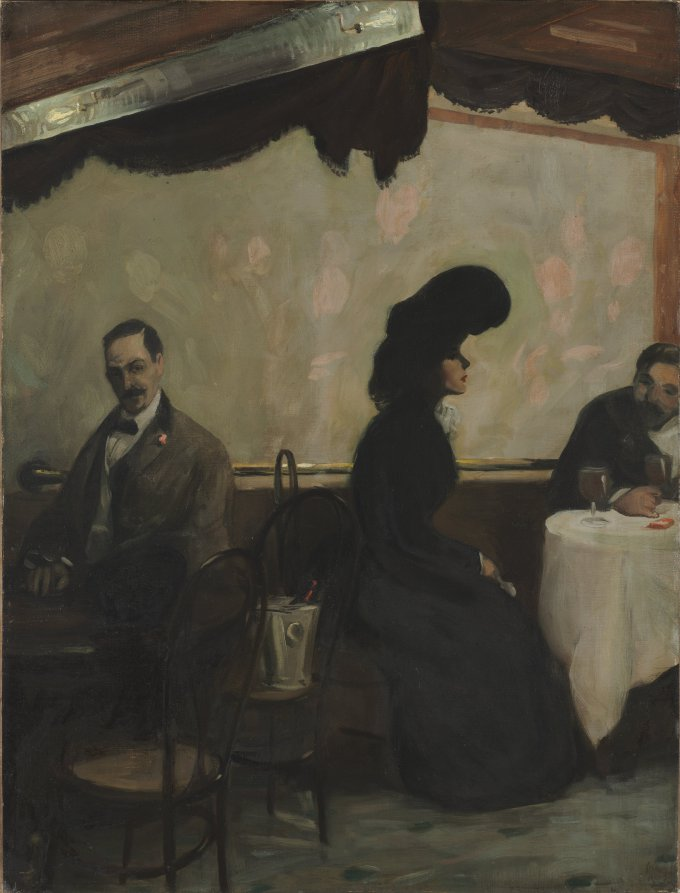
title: The Rathskeller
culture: America, early 20th Century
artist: John Sloan (American, 1871–1951)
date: 1901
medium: oil on canvas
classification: Painting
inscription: Signed lower right: "John / Sloan [JS in monogram]"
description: Economic differences infuse Sloan’s scene of patrons at a Philadelphia bar. Here, a working-class woman sharing a beer with a companion captures the attention of a lone man who has ordered the more costly champagne. One contemporary critic characterized this wealthier man as “a spider watching for the fly.”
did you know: Sloan worked as an illustrator for various newspapers before becoming a professional painter and printmaker.